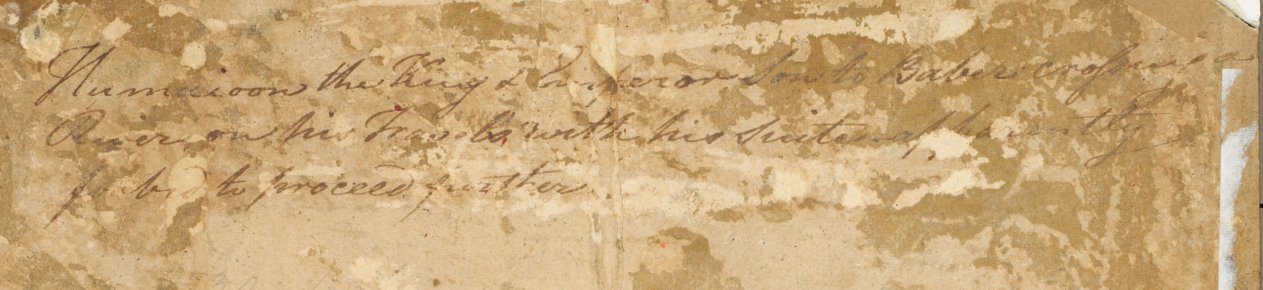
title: Babur meeting with Sultan Ali Mirza at the Kohik River, from a Babur-nama (Memoirs of Babur)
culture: India, Mughal school, 16th century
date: c. 1590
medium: Gum tempera and gold on paper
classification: Painting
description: Thirty years before he captured Delhi and founded the Mughal Empire, Babur began his expansionist activities at the age of 13, as depicted in this painting of an encounter that took place in 1496. Having traveled long distances across harsh dry terrain, Babur confronted one of his rivals who, like him, was angling to march on and conquer the illustrious city of Samarkand, the former capital of his ancestor Timur.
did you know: Camels carry collapsed tents to be pitched for nightly encampments and parties.